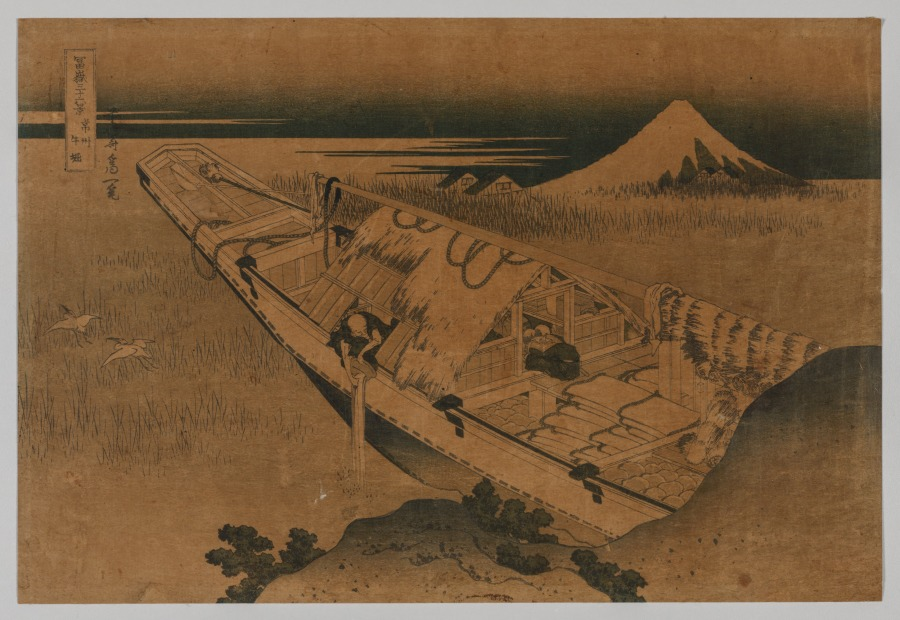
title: Fuji from Ushibori, Province of Hitachi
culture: Japan, Edo period (1615–1868)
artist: Katsushika Hokusai (Japanese, 1760–1849)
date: 1760–1849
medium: color woodblock print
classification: Print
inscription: Signature: Zen Hokusai I-itsu fude